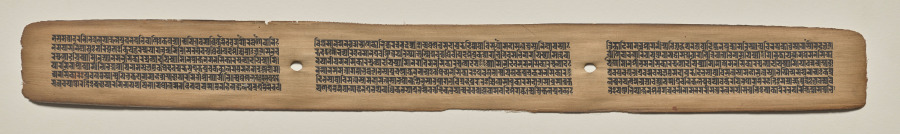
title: Text, folio 171 (recto), from a Manuscript of the Perfection of Wisdom in Eight Thousand Lines (Ashtasahasrika Prajnaparamita-sutra)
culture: Eastern India, Bihar, Vikramashila Monastery. Painting: Nepal, Kathmandu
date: Sunday, September 14, 1119 (year 239 of the Newar Samvat in the month of Ashvina)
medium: gum tempera and ink on palm leaves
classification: Painting